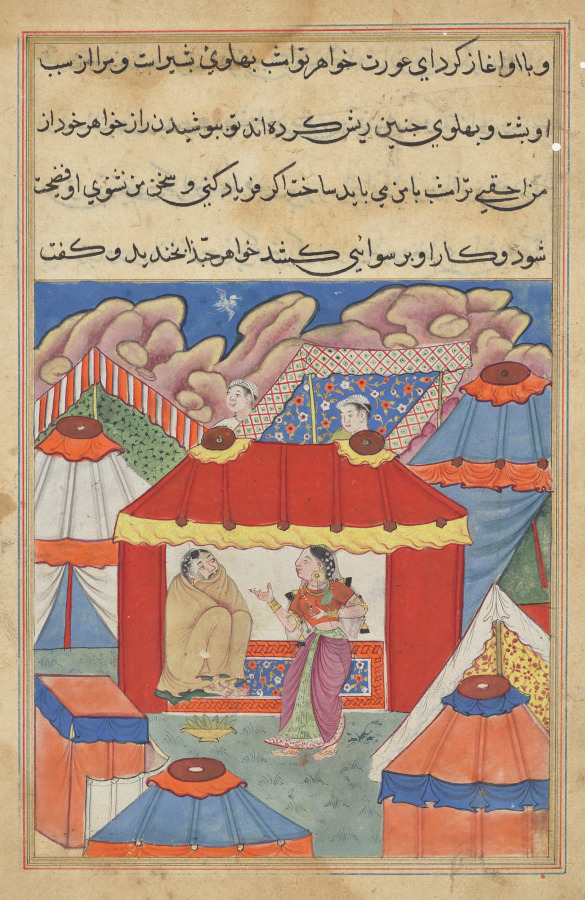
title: Habbaza’s sister, who is sent to console her, discovers the disguised Arab in her place, from a Tuti-nama (Tales of a Parrot): Twenty-fourth Night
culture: Mughal India, court of Akbar (reigned 1556–1605)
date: c. 1560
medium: gum tempera, ink, and gold on paper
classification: Painting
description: The man on the left, disguised as Habbaza, has just been badly beaten by Habbaza’s husband. He is the Arab man who has temporarily taken the woman’s place while she visits with her lover. Upon entering the tent to heal her sister’s wounds, Habbaza’s sister quickly discovers the ruse and begins an affair of her own.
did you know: The tents in the arid landscape evoke the Bedouin community of the Arabian Peninsula.